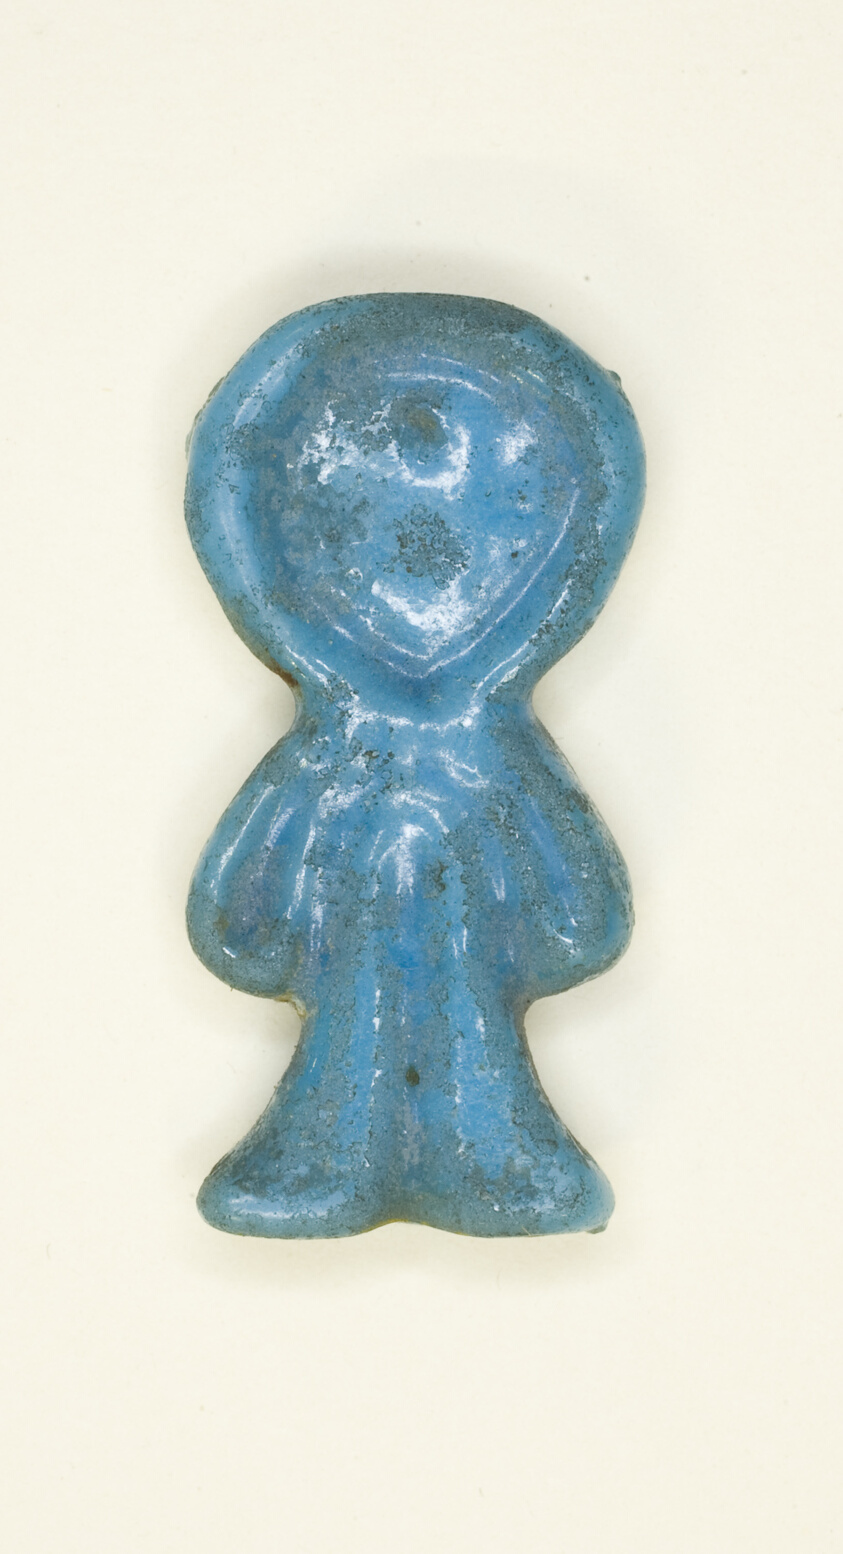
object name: Costume and Accessories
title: Amulet of Tyet (Isis Knot)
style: late period (egyptian), egyptian, ancient, twenty-sixth dynasty, saite period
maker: Egyptian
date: Late Period, Dynasty 26 (664–525 BCE)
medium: Faience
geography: Egypt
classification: amulet; ceramics; jewelry; ancient art; costume; faïence (composite material)